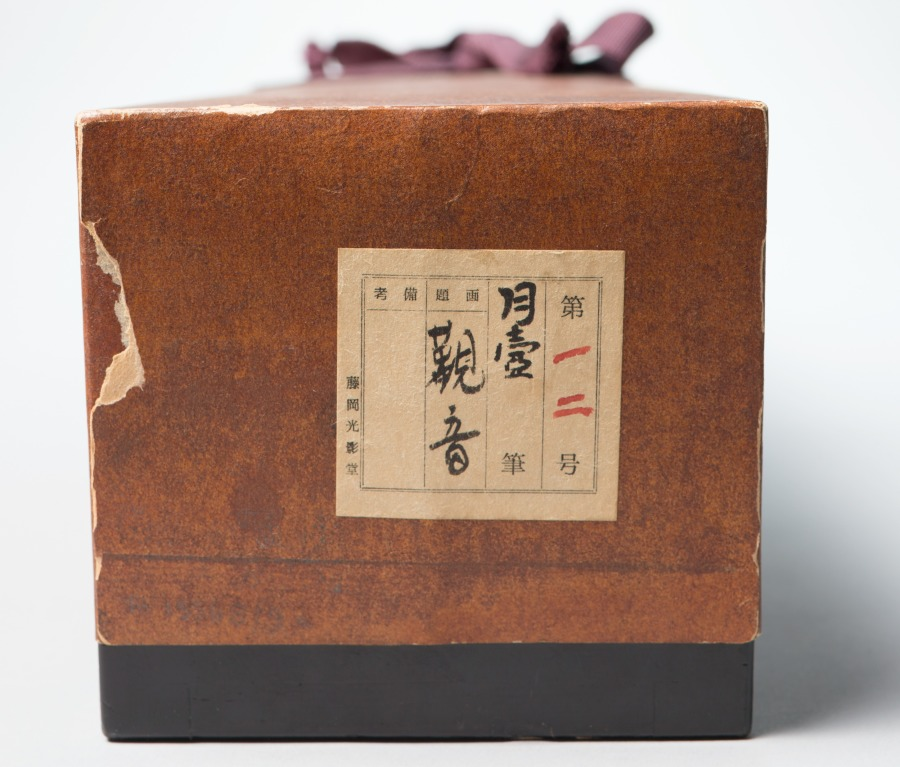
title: White-Robed Guanyin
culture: China, Southern Song dynasty (1127-1279)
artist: attributed to Zhang Yuehu (Chinese, active 1200s)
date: late 1200s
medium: Hanging scroll; ink on paper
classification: Painting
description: The figure here sits on a rocky elevation representing Potalaka in the Southern Sea, Avalokitesvara’s island home. A vase with a bamboo sprig holds pure water, the nectar of life. Bamboo shines through the figure’s halo, a way of seeing the illusionary world through the Buddhist truth. Avalokitesvara (Guanyin in Chinese), the bodhisattva of compassion, was integrated into the Chan Buddhist canon of venerated beings. In this context, the bodhisattva is often depicted in its female manifestation as the White-Robed Guanyin. The worship of the feminine White-Robed Guanyin has its origins on Mount Tianzhu in Hangzhou, where Qian Liu (852–932), ruler of the Wuyue kingdom, established the Upper Tianzhu Monastery to venerate her image.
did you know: As an artist, Zhang Yuehu was better known in Japan than in his own country.